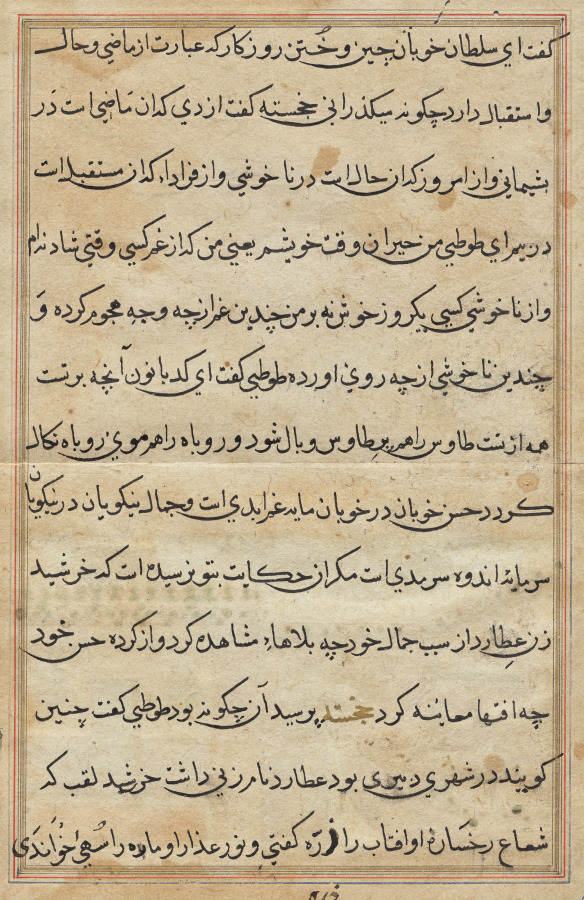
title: Page from Tales of a Parrot (Tuti-nama): text page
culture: Mughal India, court of Akbar (reigned 1556–1605)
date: c. 1560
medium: gum tempera, ink, and gold on paper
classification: Painting